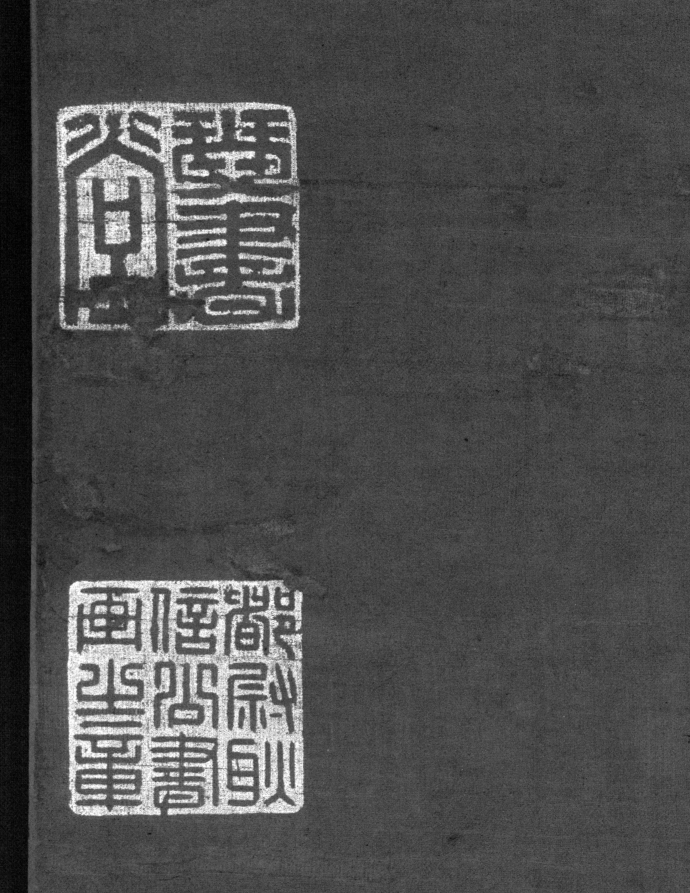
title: Summer Mountains (after Dong Yuan [active c. 937–75])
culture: China, Yuan dynasty (1271-1368)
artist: attributed to Huang Gongwang (Chinese, 1269–1354)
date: 1290–1354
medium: hanging scroll; ink and slight color on silk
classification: Painting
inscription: 【印】一峰道人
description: This monumental landscape is drawn in softly rounded strokes with darker lines frequently applied on top of lighter ones. This technique recalls one of the suggestions included in a collection of the artist's writings known as Secrets of Landscape Painting: The most difficult thing in painting is using the ink. The artist begins by using dilute ink and builds it up to the point where it begins to look right, then uses dense, black ink, applied fairly dry, and washes of deeper-toned ink. This technique distinguishes the fields from the paths, the far from the near. Huang Gongwang may have learned this technique from observing nature through the eyes of an earlier master, Dong Yuan, a painter whose style he shared.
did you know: The wet hills and moist, rich atmosphere evoke the southern Chinese summer, characterized by monsoon rains and lush growth.